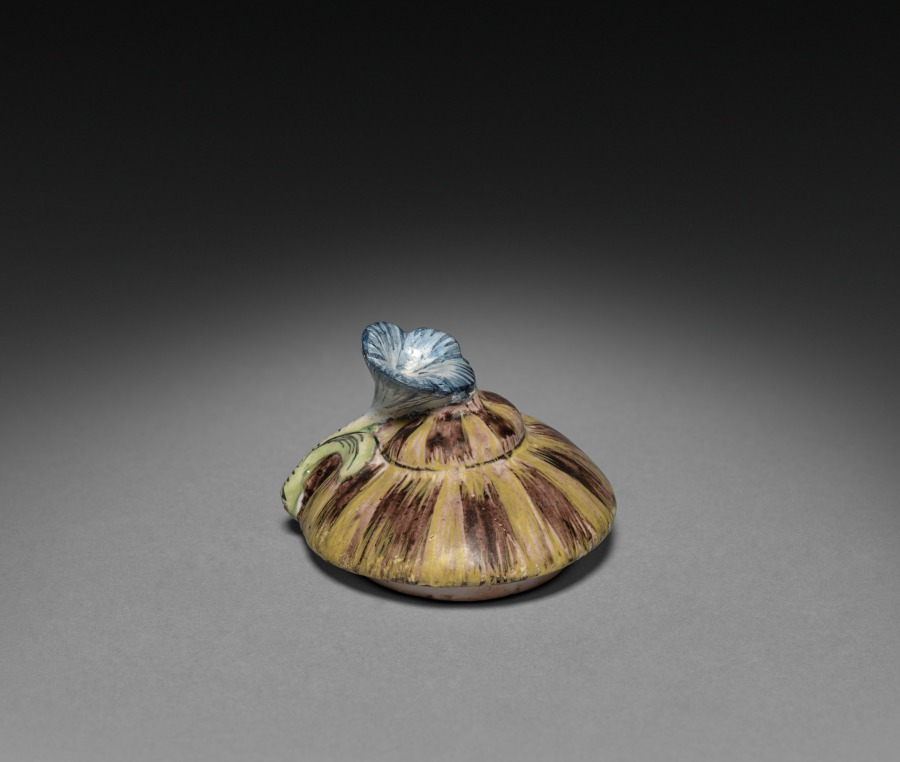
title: Cover for a Box in the Form of a Snail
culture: France, 18th century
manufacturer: Strasbourg Factory (France)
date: c. 1750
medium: faience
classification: Ceramic